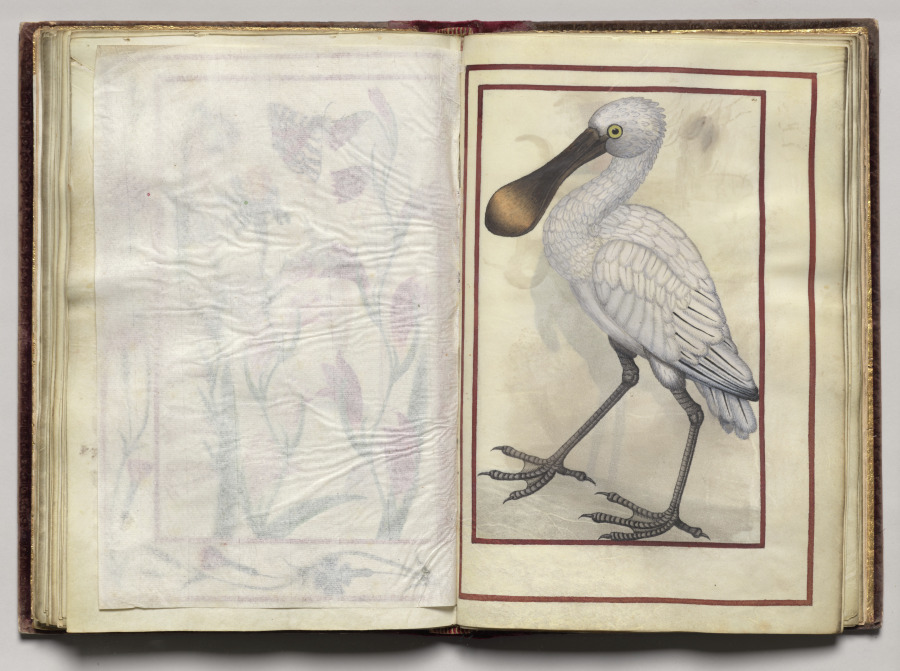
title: White Bird, folio 35 (recto), from Florilegium (A Book of Flower Studies)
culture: France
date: 1608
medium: watercolor, ink, silver, and gold over occasional traces of pencil, on vellum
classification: Bound Volume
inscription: Dated: Poitiers 1608 (on frontispiece) Signed: On frontispiece in black ink, lower right: Van Kuyk Notation on drawing: Frontispiece: in pencil, lower margin: * élève de Van Kessel, peintre flammand (* in pencil also appears in front of Van Kuyk's name).